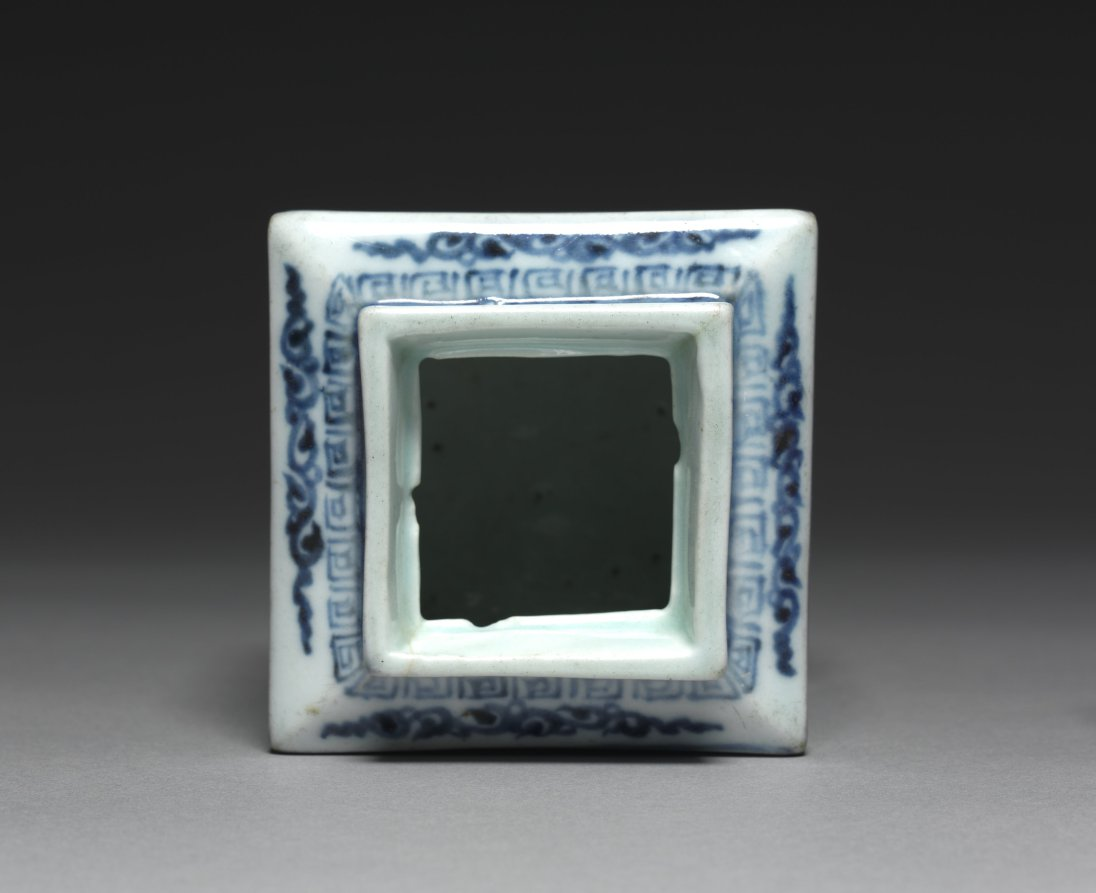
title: Square-shaped Bottle with the Scenery of the Han River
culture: Korea, Joseon dynasty (1392–1910)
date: 1800s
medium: porcelain with underglaze cobalt blue decoration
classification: Ceramic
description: The depicted scenery of this bottle is the Han River, the principal river crossing the center of Seoul. Since the 1700s, Korean artists began to paint the real landscape of Korea instead of imaginary ones of the Chinese tradition. This blue-and-white porcelain bottle is presumably a water dropper for ink. Each facet was separately made and put together before firing in a kiln. Both the landscape motif and faceted bottle were in vogue in the late 19th century, largely produced to meet the growing demand from the elite class.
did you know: The Han River is the principal river crossing the center of Seoul.